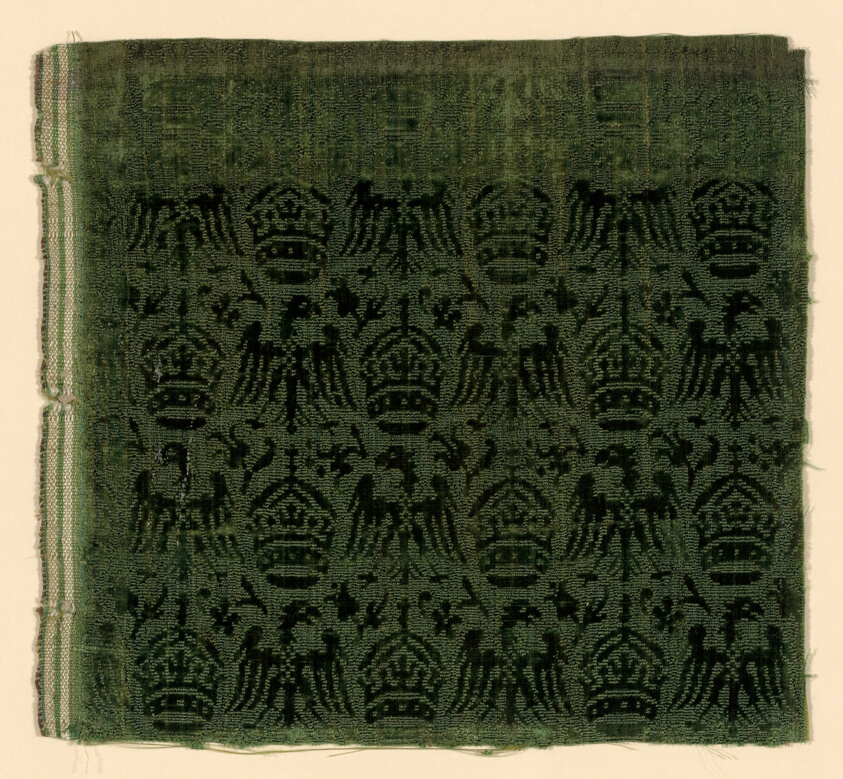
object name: Textile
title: Fragment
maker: Italy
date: 1601/35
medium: Silk, broken reversed twill ground velvet weave; solid, cut and uncut velvet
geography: Italy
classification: textile; weaving - velvet; weaving